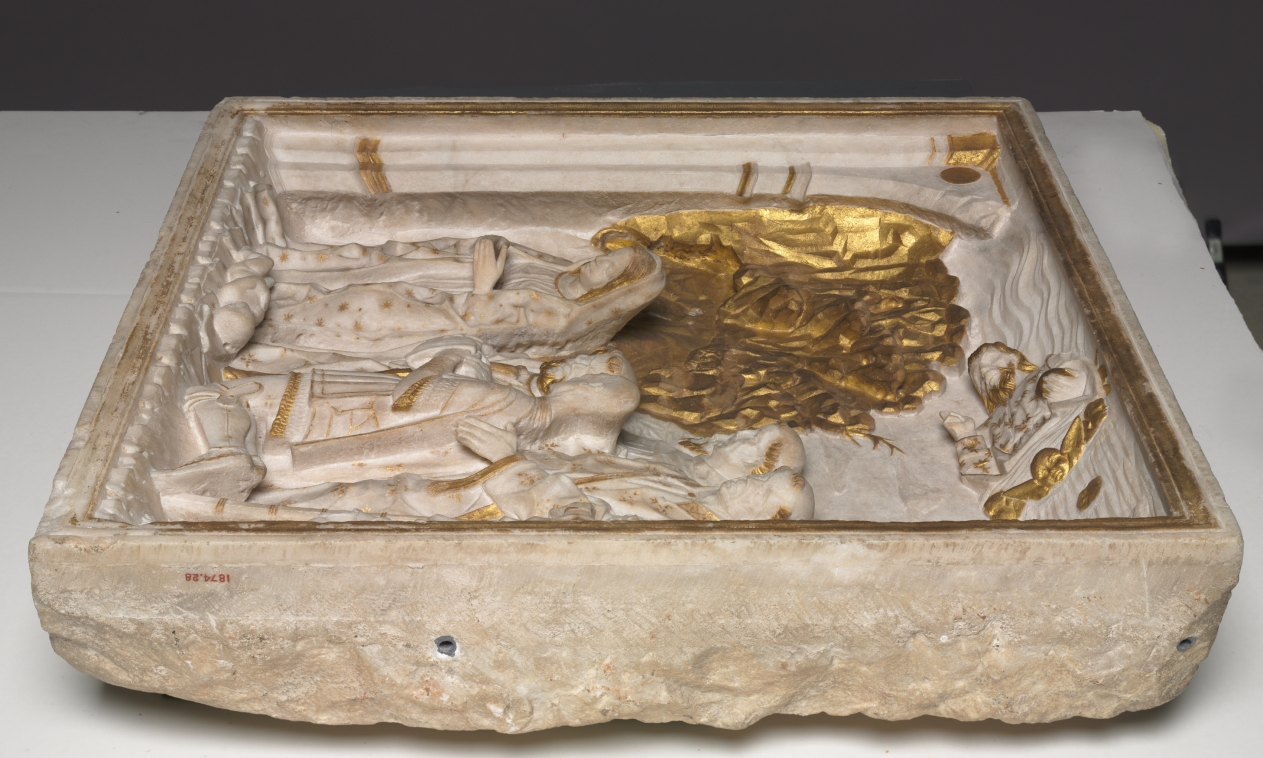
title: Pier Francesco Visconti, Court of Saliceto, Adoring the Christ Child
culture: Italy, Milan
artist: workshop of Benedetto Briosco (Italian, c. 1460–after 1514)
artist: and Tomaso Cazzaniga (Italian)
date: shortly after 1484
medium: marble with gilding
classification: Sculpture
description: This relief formed part of a public funerary monument in the church of Santa Maria del Carmine in Milan. The military leader and diplomat humbly kneels in profile before the infant Christ in a naturalistic setting, drawing attention to the Holy Family’s humanity and the deceased man’s reverence.